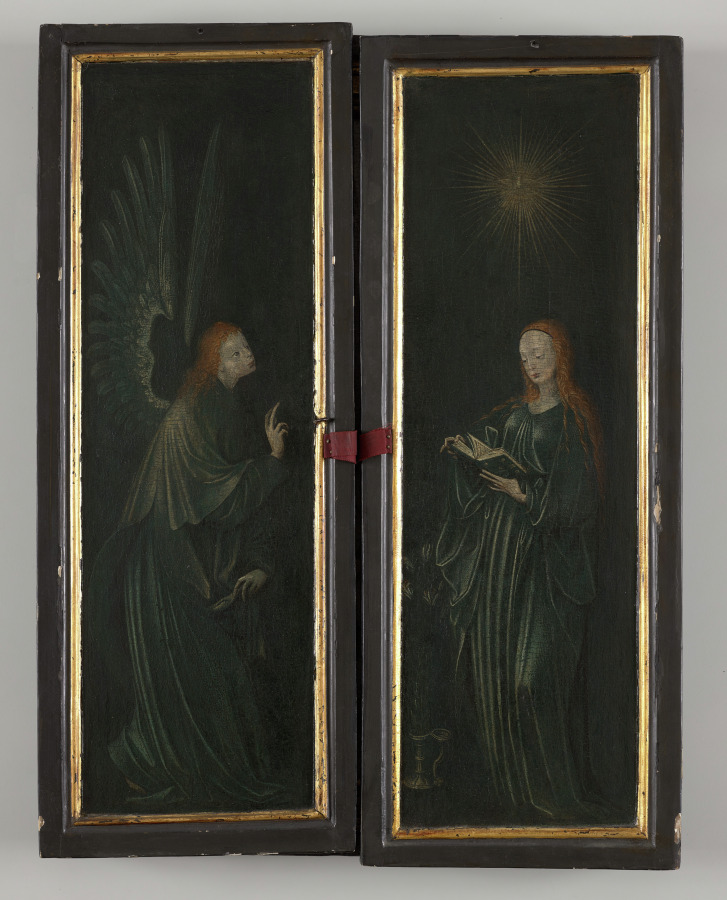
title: Triptych with The Lamentation of Christ (center), St. Barbara (left wing), St. Catherine of Alexandria (right wing), The Annunciation (reverse wings)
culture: Austria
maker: Master of the Krainburg Altar (Austrian, active c. 1485–1510)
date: c. 1500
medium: Center: oil on poplar; Wings: oil and gold leaf on poplar panel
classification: Painting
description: The triptych shows an exact representation of Jerusalem. The model is a woodcut by Erhard Reuwich for the publication Pilgrimage to the Holy Land, by Bernhard von Breydenbach, published in Mainz in 1486. This book became a bestseller, reprinted thirteen times over the next three decades. The painter who was active in today’s Slovenia around 1500 adapted this for his depiction of the Lamentation of Christ.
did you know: The Master of Krainburg was active in the area of today's Slovenia and should therefore be called the Master of Kranj in Slovenian.